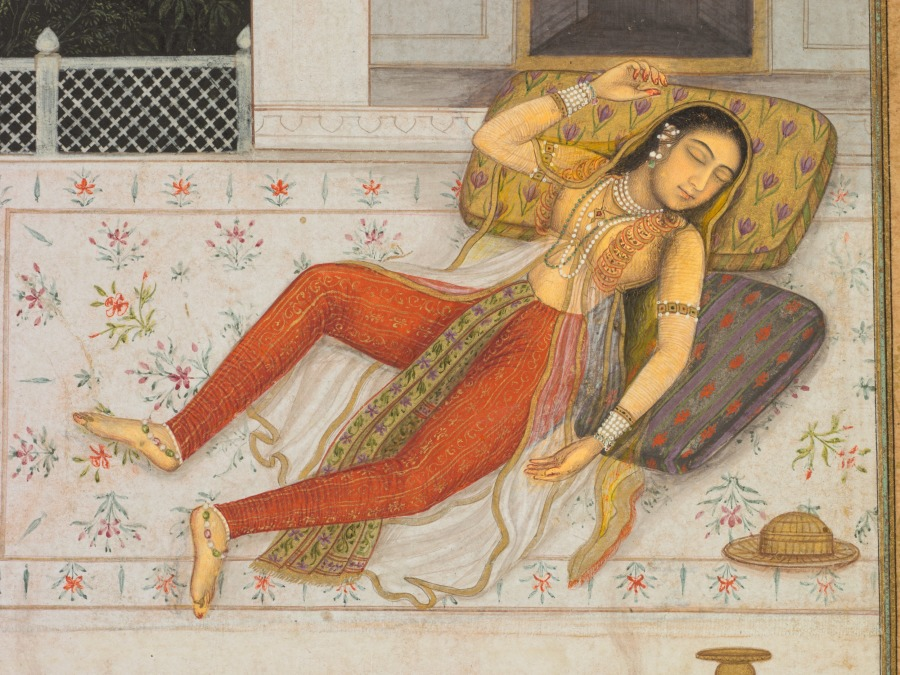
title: The dream of Zulaykha, from the Amber Album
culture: India, Mughal, 17th century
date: c. 1670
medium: Gum tempera, ink, and gold on paper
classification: Painting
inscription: verso: Central blank panel and similar borders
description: In Islamic texts, as in the Hebrew and Christian Old Testament traditions, Zulaykha is the unnamed wife of Potiphar, a wealthy Egyptian. This scene is from a popular Persian poem that recounts the story of Joseph and Zulaykha as a mystical romance, and describes her visionary dreams of a beautiful lover. In this painting we see the luxuriously dressed Zulaykha asleep on a terrace, reclining on ornate pillows as a vision of her love, Joseph, appears before her. He is illuminated by radiant light cast down by angels emerging from the dark night clouds.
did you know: Joseph, the man of Zulaykha’s dreams, is dressed as a Mughal prince.